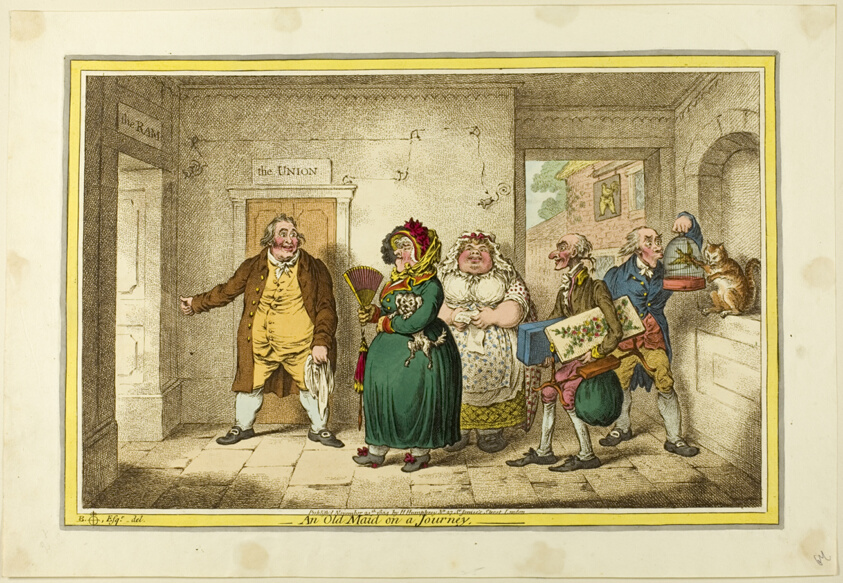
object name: Print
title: An Old Maid on a Journey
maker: James Gillray (English, 1756-1815); after Brownlow North (English, 1778-1829); published by Hannah Humphrey (English, c. 1745-1818)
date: published November 20, 1804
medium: Hand-colored etching on paper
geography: England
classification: etching; print; prints and drawing